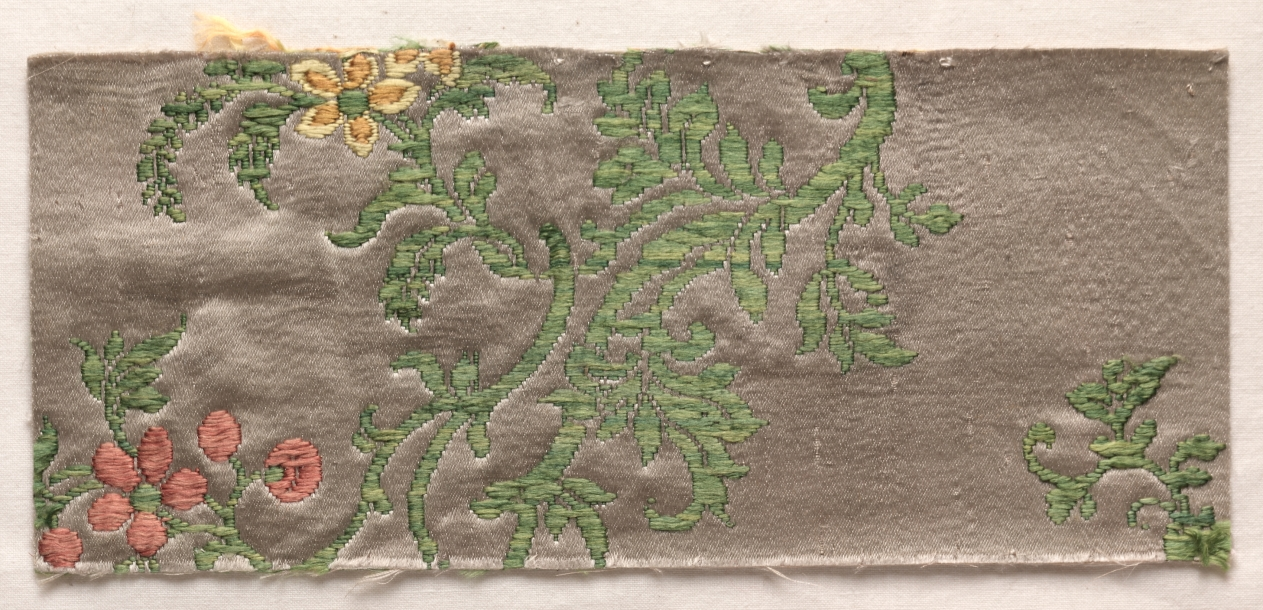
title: Fragment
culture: France, 18th century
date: 1700s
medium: silk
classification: Textile